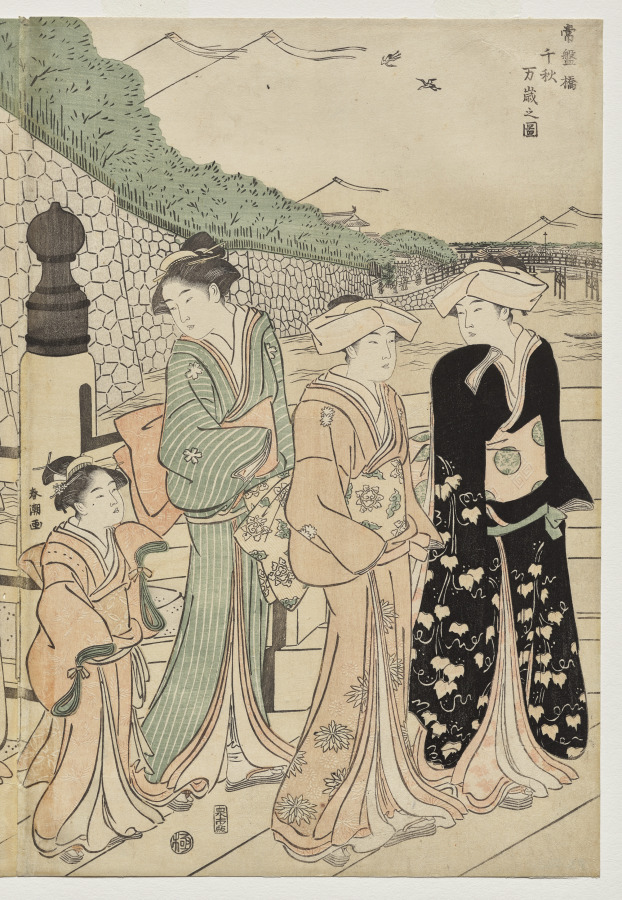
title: A Thousand Autumns, Ten Thousand Years on Tokiwa Bridge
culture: Japan, Edo period (1615–1868)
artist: Katsukawa Shunchō (Japanese)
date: early 1790s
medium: color woodblock print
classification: Print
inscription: Signature: Shuncho ga Publisher: Izumiya Ichibei (Senichi han) Censorship Seal: kiwame